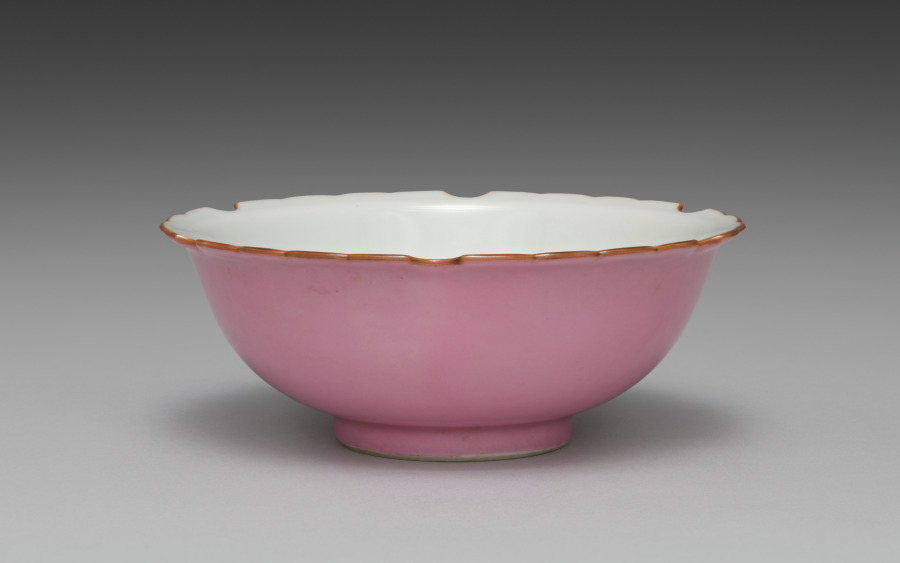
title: Dish from Snow-Flake Side Dishes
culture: Japan, Meiji period (1868–1912)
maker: Seifū Yohei III (Japanese, 1851–1914)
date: 1893–1914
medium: One from a set of six porcelain dishes; porcelain with lobed rims and pink glaze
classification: Ceramic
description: According to the box lid, this set of six side dishes, or mukōzuke, are “snow-flower style” (sekkashiki), having mouths shaped like snowflakes. Their mouths, which have six lobes and scalloped edges, are traced with brown iron oxide at the rim. The outside of each bowl is glazed with a very bright pink over the basin and foot, and the inside is left white. From directly above, one sees a snowflake-like shape, and from the side, they seem to float above a rosy ground.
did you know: The box for this set of dishes has an inscription on the side noting that they were for a person with the family name Nakamoto.